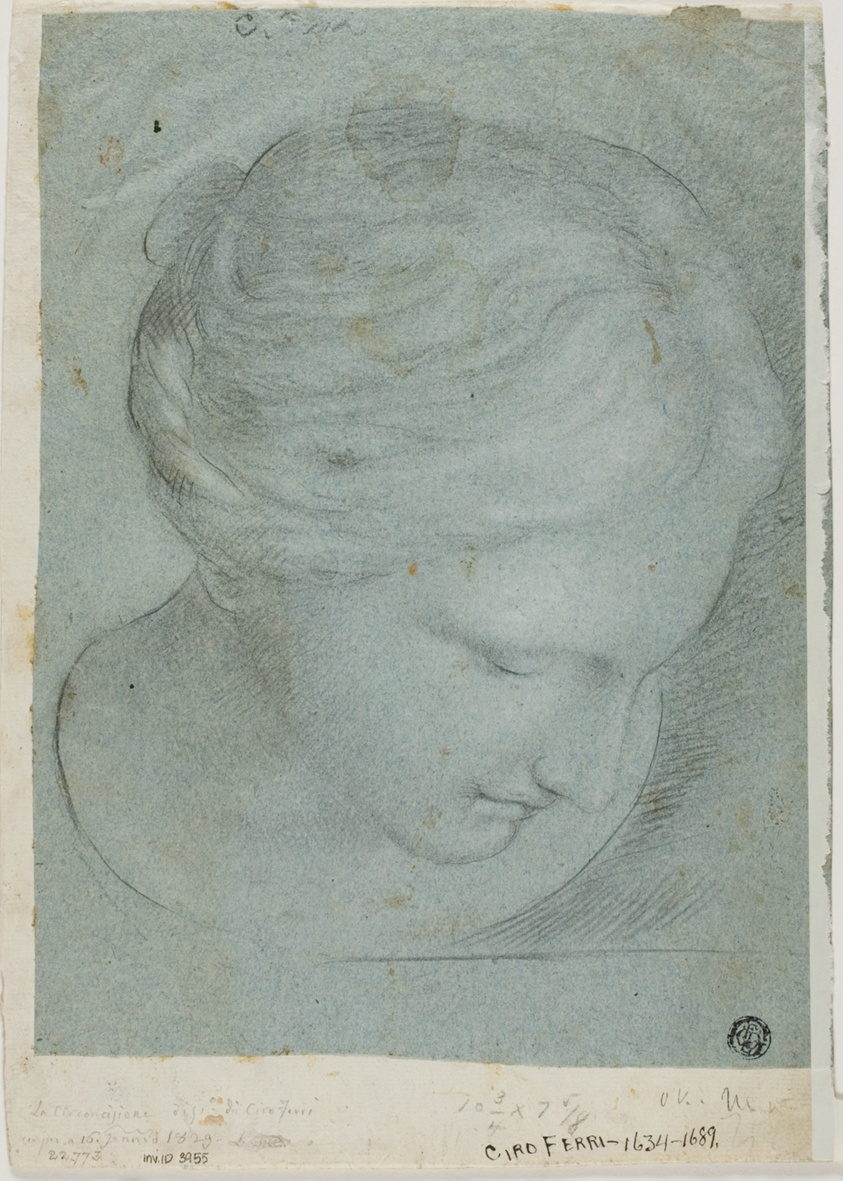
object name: Drawing and Watercolor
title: Sculpted Female Head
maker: Ciro Ferri (Italian, 1634-1689)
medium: Black chalk heightened with white chalk, on blue laid paper, laid down on ivory laid paper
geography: Italy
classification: drawings (visual works); prints and drawing